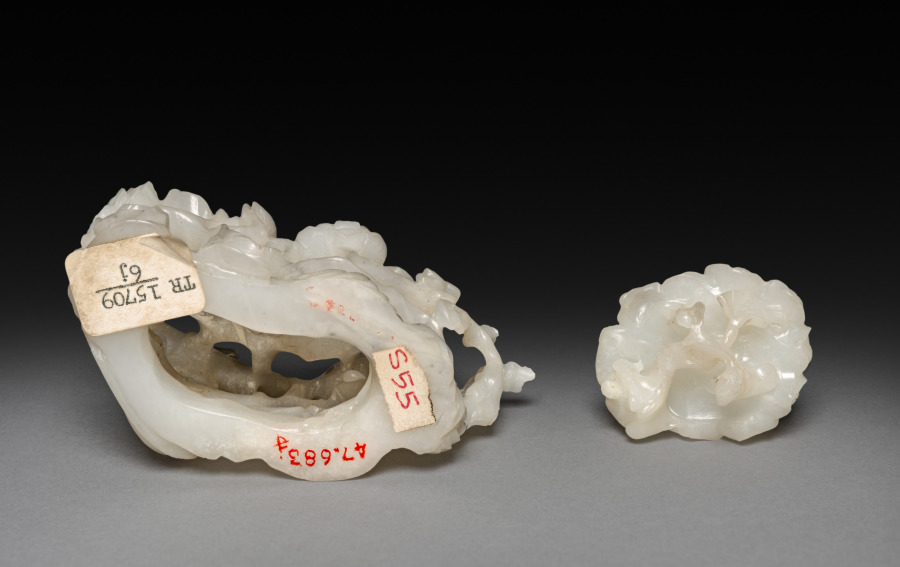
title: Three-Sectional Altar Group: Cylindrical Carving with Phoenix (base)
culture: China, Qing dynasty (1644-1911)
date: 1644–1911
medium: jade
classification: Jade